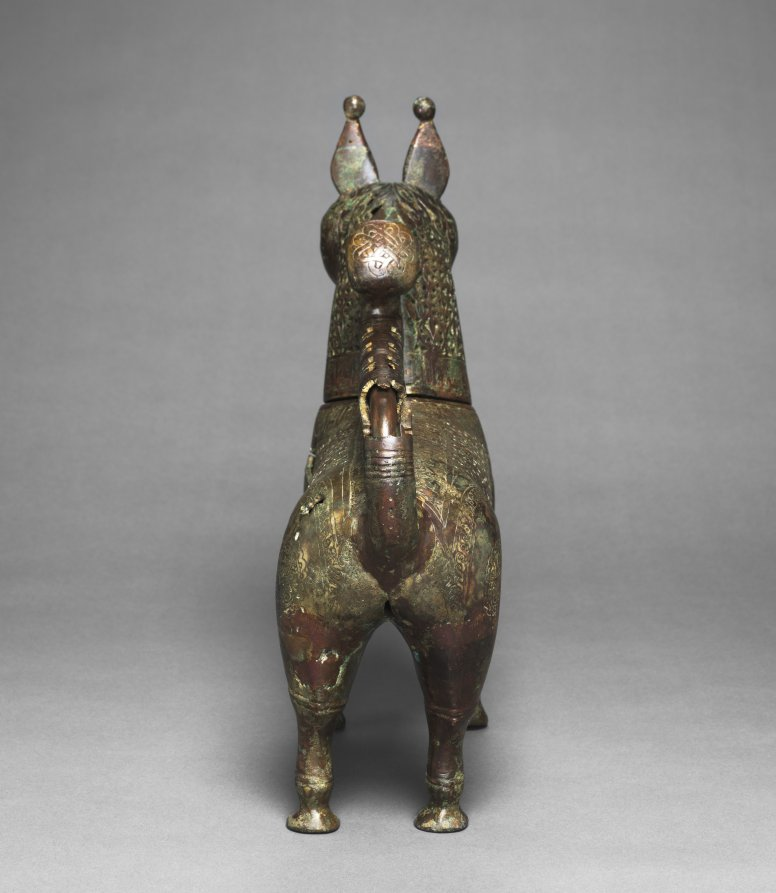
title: Feline Incense Burner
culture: Iran, Khurasan, Seljuq period of Iran (1037–1194)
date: 1150–1200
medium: Copper alloy, cast, engraved, chased, and pierced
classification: Metalwork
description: In Iran during the 1000s and 1100s, vessels in the shape of animals gained popularity, especially as incense burners. Felines were favored in Persian art and this piece may represent a caracal, a type of lynx. The head of the creature was cast separately and is removable to fill its body with hot coals and incense. Qur’anic verses on the neck and spine remind worshippers to set work aside, attend prayer, and then disperse to seek God’s bounty. The diffusion of perfumed smoke through the burner’s pierced palmette design may have served as a sensorial reminder of this teaching.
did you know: Arabic inscriptions in Kufic script against a background of scrolling arabesques run along the back and neck of the feline form.